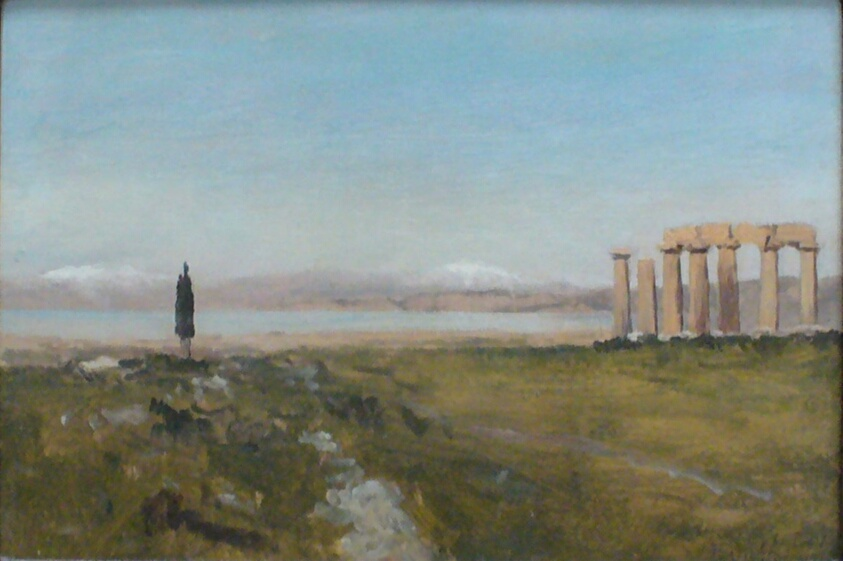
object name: Drawing and Watercolor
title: Corinth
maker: Lockwood de Forest (American, 1850-1932)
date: 1878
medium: Oil on card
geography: United States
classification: drawings (visual works); prints and drawing